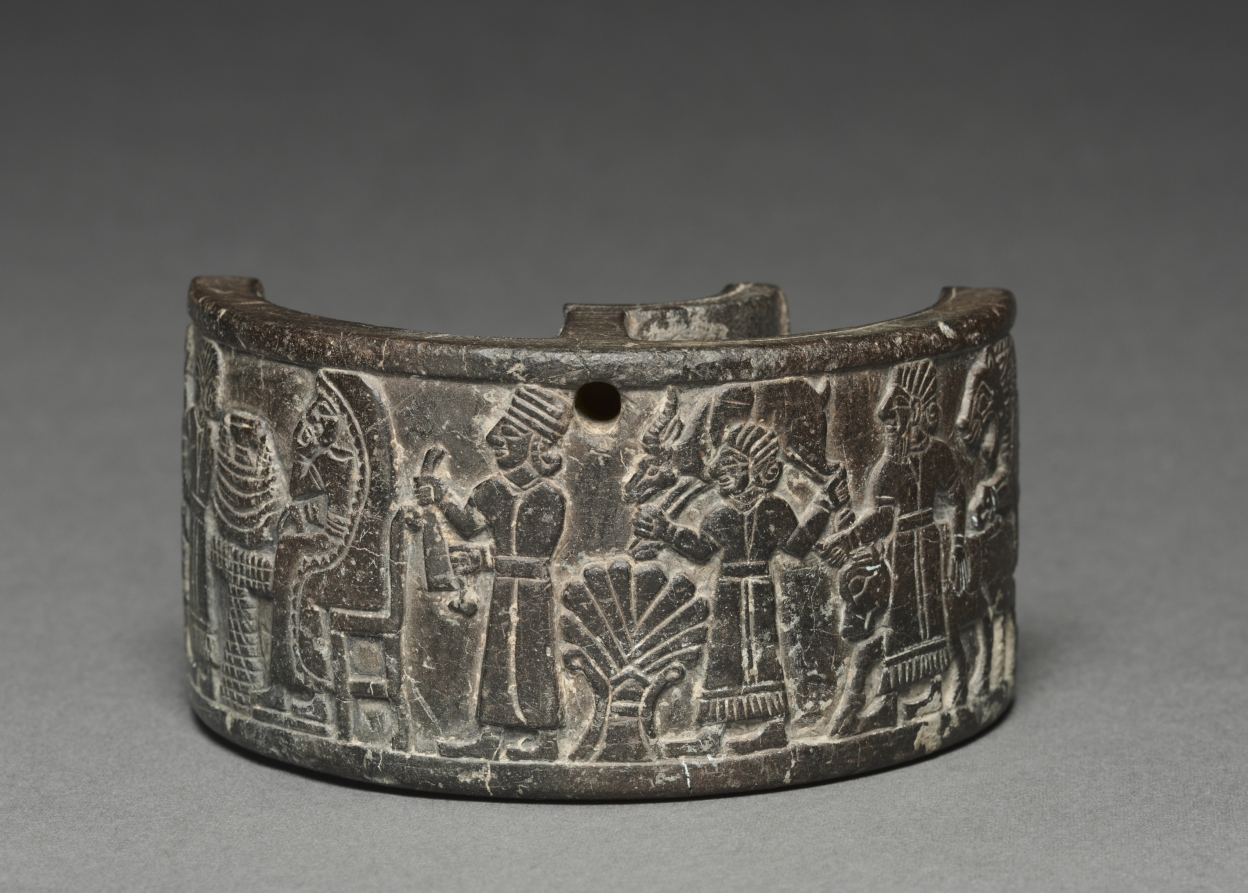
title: Banquet Pyxis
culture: Anatolia, Neo-Hittite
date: 800–750 BCE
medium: steatite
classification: Sculpture